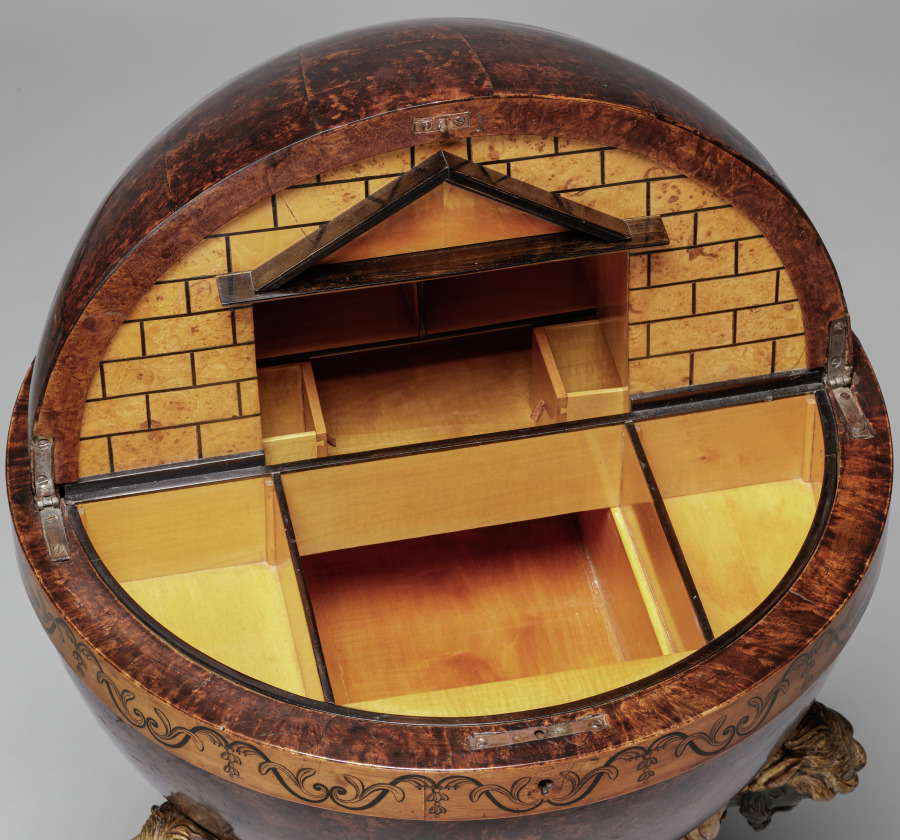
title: Globe Work Table (Globustisch)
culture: Austria, Vienna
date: c. 1810–15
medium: Burl walnut veneer, mahogany, ebony, satinwood, gilt wood, painted wood; mirrored glass; metal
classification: Furniture and woodwork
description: Work tables resembling globes were the usual form for a lady's sewing or writing table around 1800 in Austria. Combining moving parts, secret compartments, and highly finished decoration, these tables were also a way for the cabinetmaker to show off his skill. The tripod supports and temple-like architectural quality of both the exterior and interior decoration reflect the fashionable taste for neoclassical style, or Biedermeier as it was called in Austria, where Vienna was the center of such elaborate furniture production.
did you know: The top half of the globe rotates upward to reveal hidden compartments for sewing tools, threads, and unfinished fabric pieces.